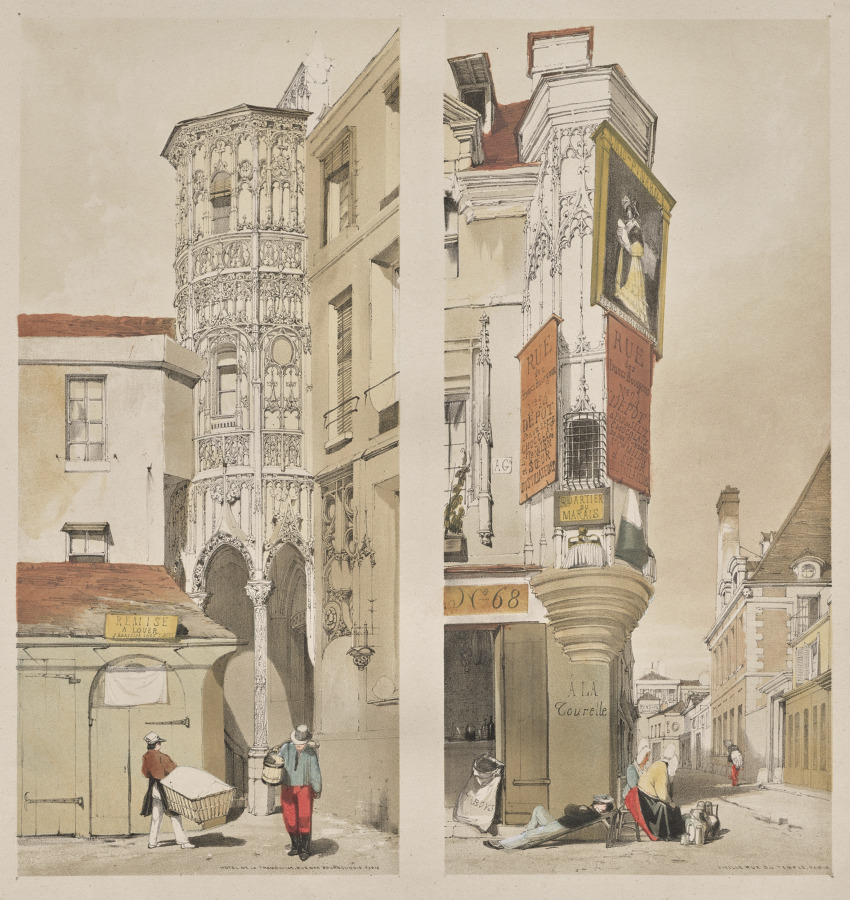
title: Picturesque Architecture in Paris, Ghent, Antwerp, Rouen: Vieille Rue du Temple, Paris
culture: England, 19th century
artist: Thomas Shotter Boys (British, 1803–1874)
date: 1839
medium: lithograph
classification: Portfolio